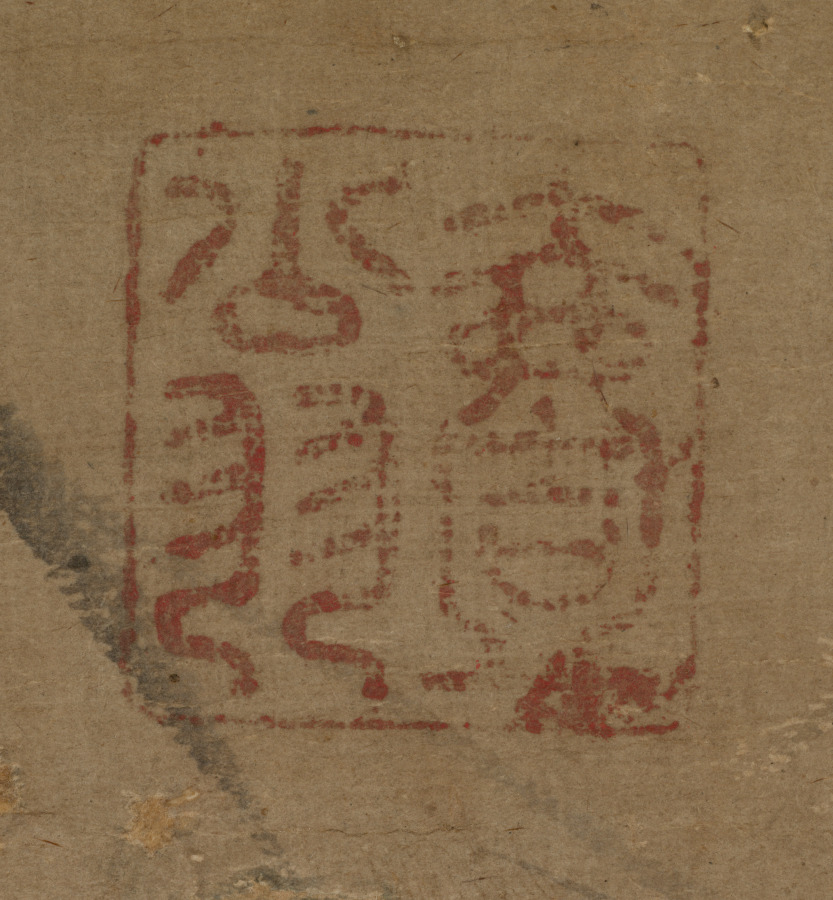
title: Reeds and Geese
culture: Japan, Kamakura period (1185–1333)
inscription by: Yishan Yining [Issan Ichinei] (Chinese, 1247–1317)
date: 1314–17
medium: hanging scroll; ink on paper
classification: Painting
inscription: signed: Issan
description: Reeds and geese has been a common pairing in Chinese literary and visual culture for many centuries. This painting presents the contribution of a Japanese amateur painter, almost certainly a Zen Buddhist monk, to Japan’s fledgling efforts to add the theme to its own cultural vocabulary in the early 1300s. As was customary at the time in Japan, the painter did not sign or seal his work; the inscription, a poem added to the painting by the eminent émigré monk Yishan Yining, along with his signature and seal, was of far greater cultural value. Today, the modestly sized painting has tremendous significance as one of the earliest surviving examples of Japanese ink paintings with reeds and geese.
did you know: Tokyo National Museum owns a copy of this painting made by Kano Gyokusen (1796–1864) when he was 14 years old.